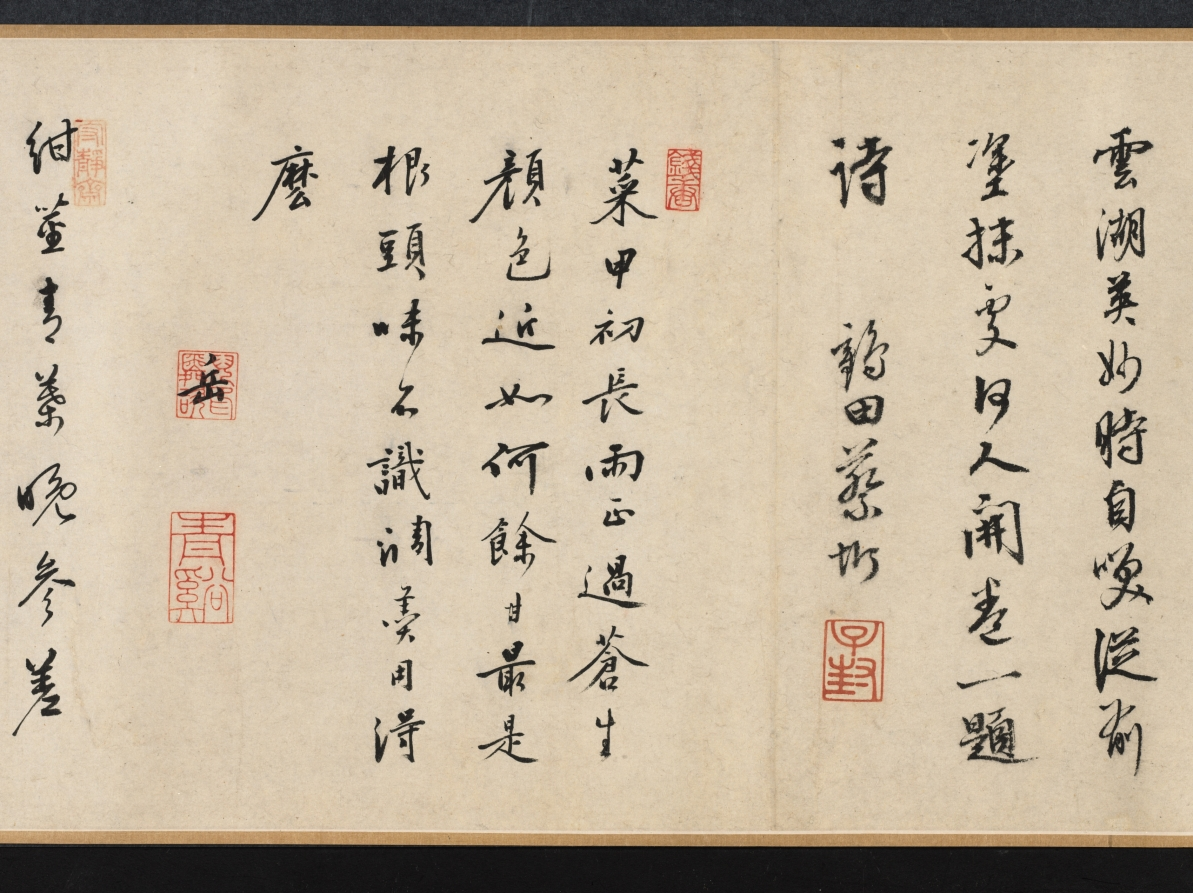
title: Chrysanthemums and Cabbage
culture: China, Ming dynasty (1368–1644)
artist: Tao Cheng (Chinese, active c. 1471–after 1502)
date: c. 1486 or before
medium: handscroll, ink and slight color on paper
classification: Painting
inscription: Artist's seal at beginning of painting: Yun hu 雲湖. Title by Wang Wenzhi 王文治 (1730–1802), date 1756. 2 seals of Wang Wenzhi 王文治 (1730-1802); 3 seals of Ku Yün (n. d.)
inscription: Section A (Chrysanthemums): 1 poem and 1 seal of Zhang Yuanzhen 張元禎 (1437–1507) - Jinshi, 1461; 1 poems and 3 seals of Ni Yue 倪岳 (1444–1501) - Jinshi, 1464; 1 poems and 2 seals of Zhao Xiang 趙祥 (life dates unknown) - Jinshi, 1469; 1 poems and 1 seals of Wu Xixian 吳希賢 (1437–1489) - Jinshi, 1464; 1 poems and 1 seals of Lü Chang 呂㦂 (1449–1511) - Juren, 1471; 1 poems and 3 seals of Fu Han 傅瀚 (1435–1502) - Jinshi, 1464; 1 poems and 1 seals of Feng Jue 馮珏 (life dates unknown) - Jinshi, 1478.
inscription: Chrysanthemums section, poem 1, by Zhang Yuanzhen 張元禎 (1437–1507): Several bushes of chrysanthemums grow in front of the Five-Willow Cottage,/ The yellow ones are really yellow and the white ones white./ This affable and decent fellow, young in years and unsophisticated,/ Has snapped one of the branches to dip in ink. (The Five-Willows Cottage was the home of the poet Tao Qian 陶潛 (Tao Yuanming 陶淵明, AD 365-427).) Chrysanthemums section, poem 2, by Ni Yue 倪岳 (1444–1501): Where at the Eastern Fence can you grieve for the Soul of the Xiang River?/ A man of upright character is mourned within the traces of ink./ White jade with a slight flaw would be a grievance forever,/ Later men should understand why even the roots of the flowers are washed. (Eastern Fence refers again to the poet Tao Qian 陶潛, while the Soul of the Hsiang River refers to the poet Qu Yuan 屈原 (c. 340–278 BC).) Chrysanthemums section, poem 3, by Zhao Xiang 趙祥 (life dates unknown): A clump of chrysanthemum grows in front of the bamboo pavilion,/ The winds of many autumns have blown since we parted beyond the river./ Straining wine through the official's cap of Tao [Qian] to prolong autumn's pleasures,/ The mists and clouds of ten thousand miles belong to the intoxicated. Chrysanthemums section, poem 4, by Wu Xixian 吳希賢 (1437–1489): It is a different spring if mulberry is planted during the latter part of the year,/ The dust of the world originally did not drop on clothing./ Who spills out ink under the Eastern Fence/ And paints so freely this portrait of chrysanthemums for the venerable Sir Tao? Chrysanthemums section, poem 5, by Lü Chang 呂㦂 (1449–1511): This full tray of ink for painting [flowers] at the Eastern Fence;/ Their whiteness or yellowness is not essential in capturing their beauty./ I don't have to go to Jiangnan to see them myself./ At my old house grow two or three branches. Chrysanthemums section, poem 6, by Fu Han 傅瀚 (1435–1502): Who daubed autumn flowers with ink/ As if they were dark dew on a branch tip only vaguely seen at evening?/ After the lazy clouds disperse, no one paints;/ A certain unconventionality pervades this painting. Chrysanthemums section, poem 7, by Feng Jue 馮珏 (life dates unknown): To satisfy his hunger, [the chrysanthemums] have at times entered the poetry of Qu Yuan;/ Taking up the wine cup, it felt close to Tao Qian./ [With them I am like] a lonely root sustained by deep water/ Or an old man to whose hair the color of youth returns.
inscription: Section B (Cabbage): 1 poem and 1 seal of Cai Qi 蔡圻 (life dates unknown) - degree information not known; 1 poems and 3 seals of Ni Yue 倪岳 (1444–1501) - Jinshi, 1464; 1 poem and 3 seals of Jiao Fang 焦芳 (1436–1517) - Jinshi, 1464; 1 poem and 3 seals of Li Dongyang 李東陽 (1447–1516) - Jinshi, 1464; 1 poems and 1 seals of Wu Xixian, signed “Xixian” 吳希賢 - Jinshi, 1464; 1 poems and 3 seals of Fu Han 傅瀚 (1435–1502) - Jinshi, 1464; 1 poems and 1 seals of Lü Chang 呂㦂 (1449–1511) - Juren, 1471; 1 poems and 2 seals of Zhao Xiang 趙祥 (life dates unknown) - Jinshi, 1469; 1 poems and 1 seals of Feng Jue 馮珏 (life dates unknown) - Jinshi, 1478.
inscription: Cabbage section, poem 1, by Cai Qi 蔡圻 (life dates unknown): The ink splashes are fresh from a frosty brush dipped in pond water;/ I can visualize that time when Yunhu 雲湖 [Tao Cheng] first showed his talents./ I lament the places where I scribbled before,/ Who would open them to inscribe a poem? (The first line is an allusion to the famous Jin dynasty calligrapher Wang Xizhi 王羲之 (AD 303-361), who practiced calligraphy so diligently at the edge of a pond that the water turned black with ink.) Cabbage section, poem 2, by Ni Yue 倪岳 (1444–1501): After rain the vegetables begin to grow;/ How are the colors of the masses lately!/ Once you get used to them, the tastiest parts are the ends of the roots;/ I don't know if they can be used for "seasoning soup." ("Seasoning soup" is an allusion to the statesmanship of a chief minister.) Cabbage section, poem 3, by Jiao Fang 焦芳 (1436–1517): This crop of purple stalks and green leaves is late and irregular;/ Now the rainy season is over for the Eastern Garden./ All the nobles nowadays dine on meat;/ Who of them knows the flavor of this [cabbage]. Cabbage section, poem 4, by Li Dongyang 李東陽 (1447–1516): It's always helped the honest man to sober up after drinks./ I intend to go to the deepest part of the stream-crossed garden/ To refresh myself in the fragrance and dew of evening. Cabbage section, poem 5, by Wu Xixian 吳希賢 (1437–1489): After rain, the white silk is filled with fragrant vegetables;/ How many times this happens in Mr. Tao's paintings./ On whom will you depend to present a memorial to the ruler?/ Don't let this color emerge on the faces of the people. (The last line is meant as a warning to officials: the color of the vegetables (green) may be pleasing in itself, but when it emerges on the faces of the starving poor, it signifies a badly governed world.) Cabbage section, poem 6, by Fu Han 傅瀚 (1435–1502): For twenty years I have feasted on the excellent mutton of an official;/ Yet I talk and dream about the garden and its vegetables./ Do not merely say it is good to chew the root of the cabbage--/ You must taste to understand what poverty is. Cabbage section, poem 7, by Lu Chang 呂㦂 (1449–1511): The capital is never a place for an apprentice in the "garden of scholarship."/ Who would write about gardens and vegetables on an examination paper?/ I've walked throughout the country in spring;/ Make sure the people don't show this color. Cabbage section, poem 8, by Zhao Xiang 趙祥 (life dates unknown): After a wash of rain, the spring garden is still in order;/ The flavor [of the cabbage] is more suitable with a small drink and the hum of a tune./ The rich and powerful in their mansions consume dish after dish of meat;/ Vegetarian food is known only by the scholars. Cabbage section, poem 9, by Feng Jue 馮珏 (life dates unknown): A new cabbage is nourished with dew;/ It takes a long time to grow and mature./ The business of "seasoning the soup" is your responsibility;/ Better command the gardener to take care [of the cabbages]. trans. HK/LYSL/WKH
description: On an autumn day in Beijing, Tao Cheng had a gathering with a group of scholar-officials and created two paintings in a spontaneous, casual style. The first depicts chrysanthemums, slender bamboo stalks, and a rock in monochrome ink. Tao applied light colors for the second painting that depicts cabbage. Tao deliberately placed the images on the first sections of the paper so that his honorable guests could add their poetic inscriptions inspired by his imagery. In the first section to the right, all seven poetic inscriptions refer to the beloved poet and recluse Tao Qian (also called Tao Yuanming, AD 365–427) who was particularly known for his profound love for chrysanthemum flowers. Most of the inscriptions in the second section express sympathy for the poor, since cabbage is the main ingredient in their humble food. Taken together, the poems and paintings allude to the life and responsibilities of the scholar-official: the importance of both an upright character and a concern for the poor citizens in order to achieve good government.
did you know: Eminent calligrapher Wang Wenzhi 王文治 was only 27 sui when he wrote the title in 1756.